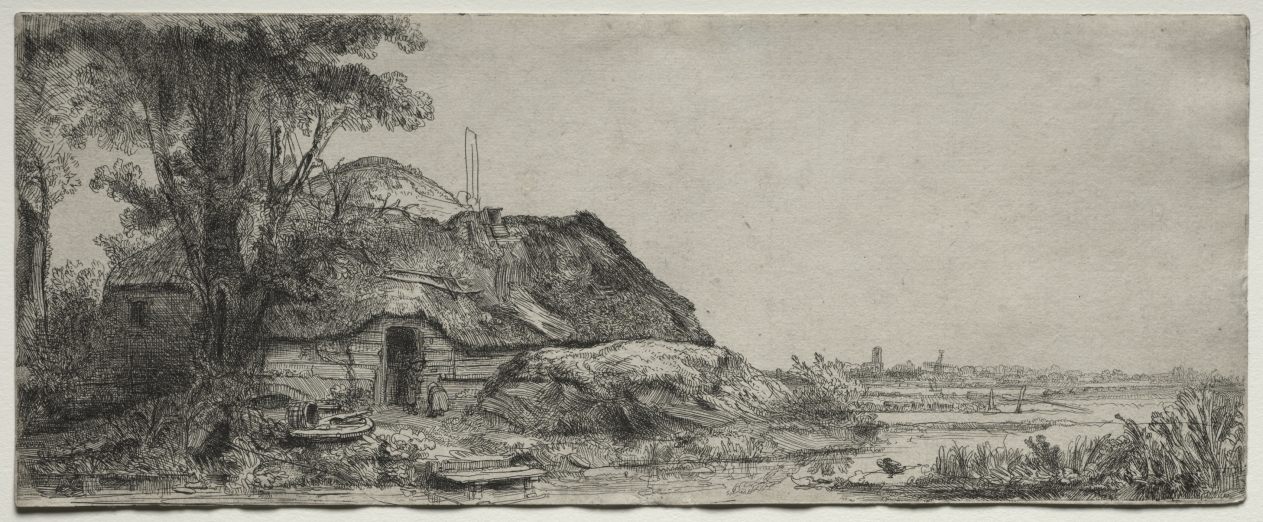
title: Landscape with a Cottage and a Large Tree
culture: Netherlands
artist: Rembrandt van Rijn (Dutch, 1606–1669)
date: 1641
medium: etching and sulphur tint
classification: Print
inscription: lower right, in plate: Rembrandt f. 1641 ; upper center, in graphite: 222 ; upper right, in graphite: 222 ; VERSO, upper right and center, in graphite (erased); [illegible] ; lower left, in graphite: a 49846